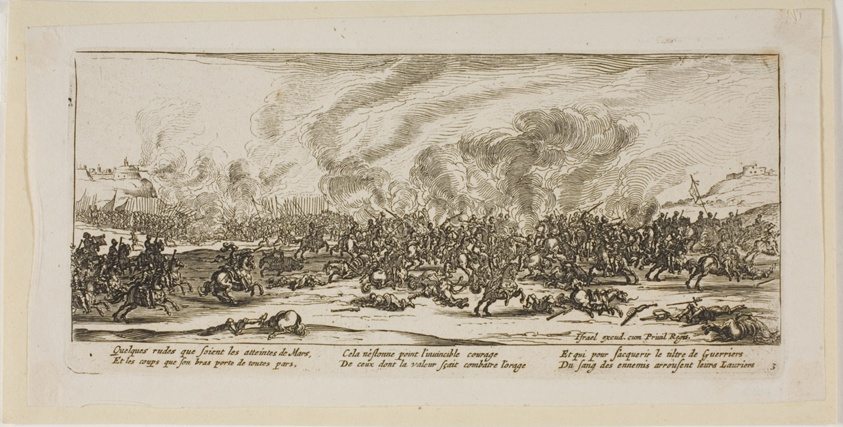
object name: Print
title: The Battle, plate three from The Large Miseries of War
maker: Gerrit Lucasz van Schagen (Dutch, born 1642); after Jacques Callot (French, 1592-1635)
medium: Etching on paper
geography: Netherlands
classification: etching; print; prints and drawing